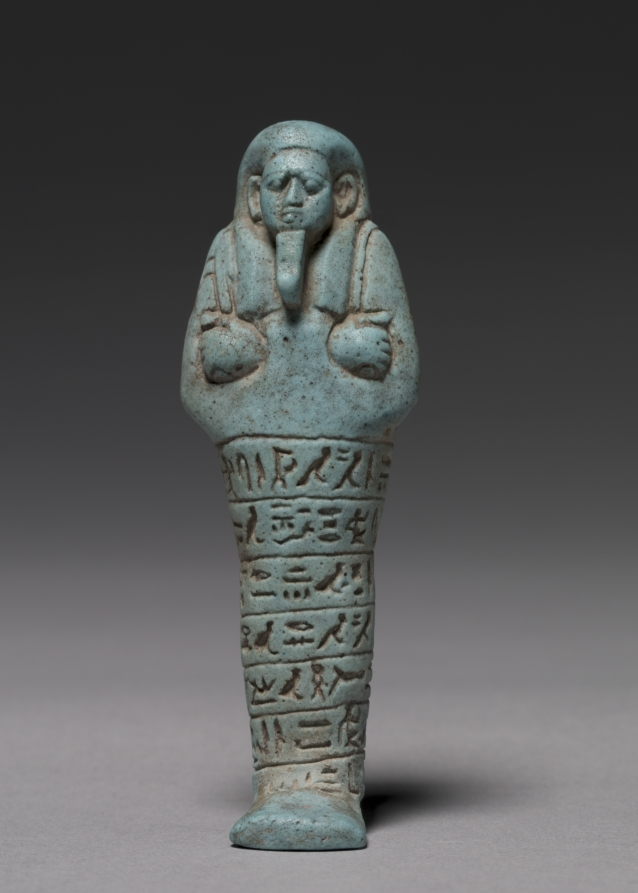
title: Shawabty of Ankh-Hor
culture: Egypt, Thebes, Late Period, Dynasty 26, reign of Psammetichus II-Apries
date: 595–586 BCE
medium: pale turquoise, vitreous Egyptian blue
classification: Funerary Equipment